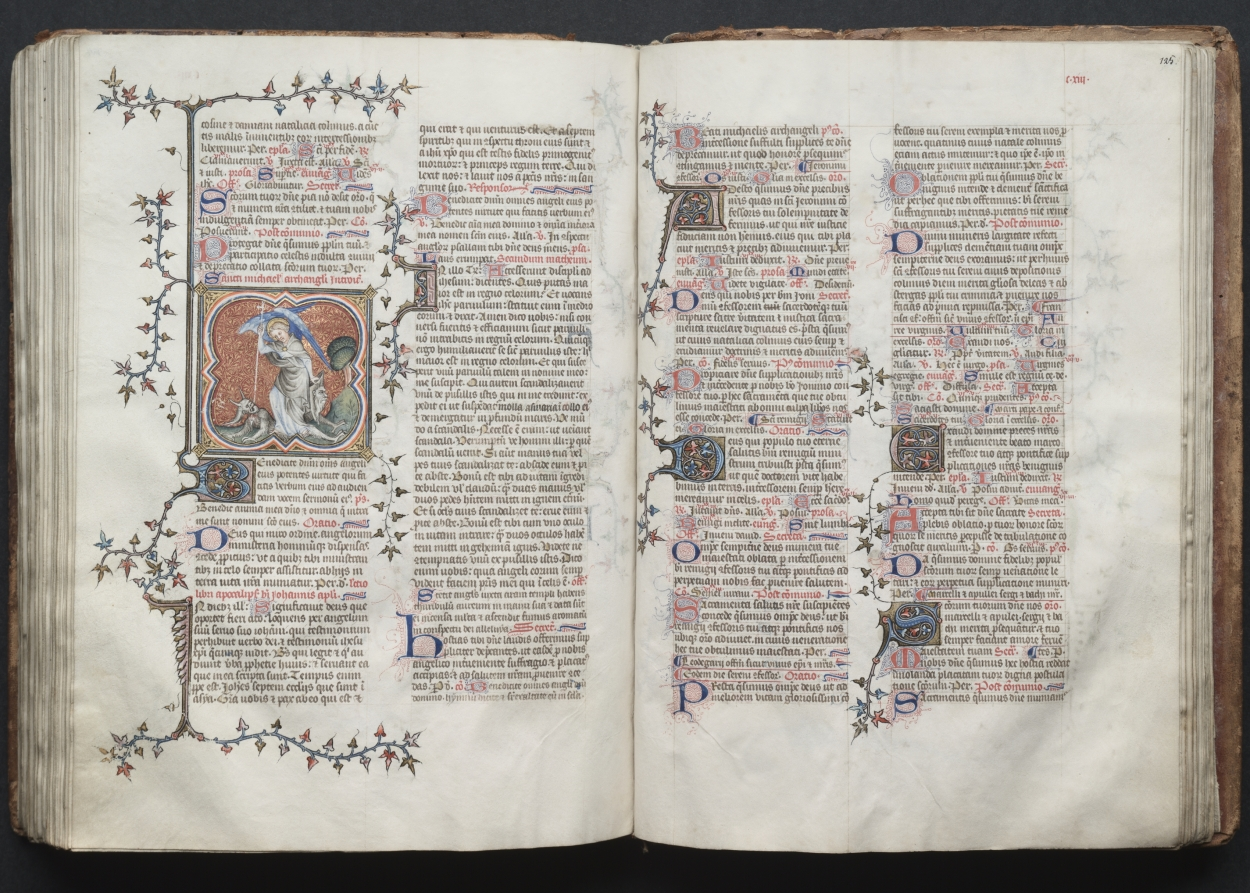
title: The Gotha Missal: Fol. 124v, The Archangel Michael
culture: France, Paris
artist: Master of the Boqueteaux (French)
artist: and Workshop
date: c. 1375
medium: ink, tempera, and gold on vellum; blind-tooled leather binding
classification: Bound Volume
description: The style and quality of this manuscript's decoration is typical of deluxe Parisian books made for aristocratic or royal patrons. Most of the book's decoration appears to be the work of the Master of the Boqueteaux, an artist active at the court of King Charles V (died 1380). His style was apparently shared by a number of book illuminators working in and around Paris. It is very possible that the Gotha Missal belonged to Charles V, but is not provable because the manuscript has no royal portraits and lacks a colophon. Given the book's magnificent decoration, however, it would seem that it was produced for a Valois prince, if not for the king himself. The manuscript receives its name from the German dukes of Gotha, its later owners.